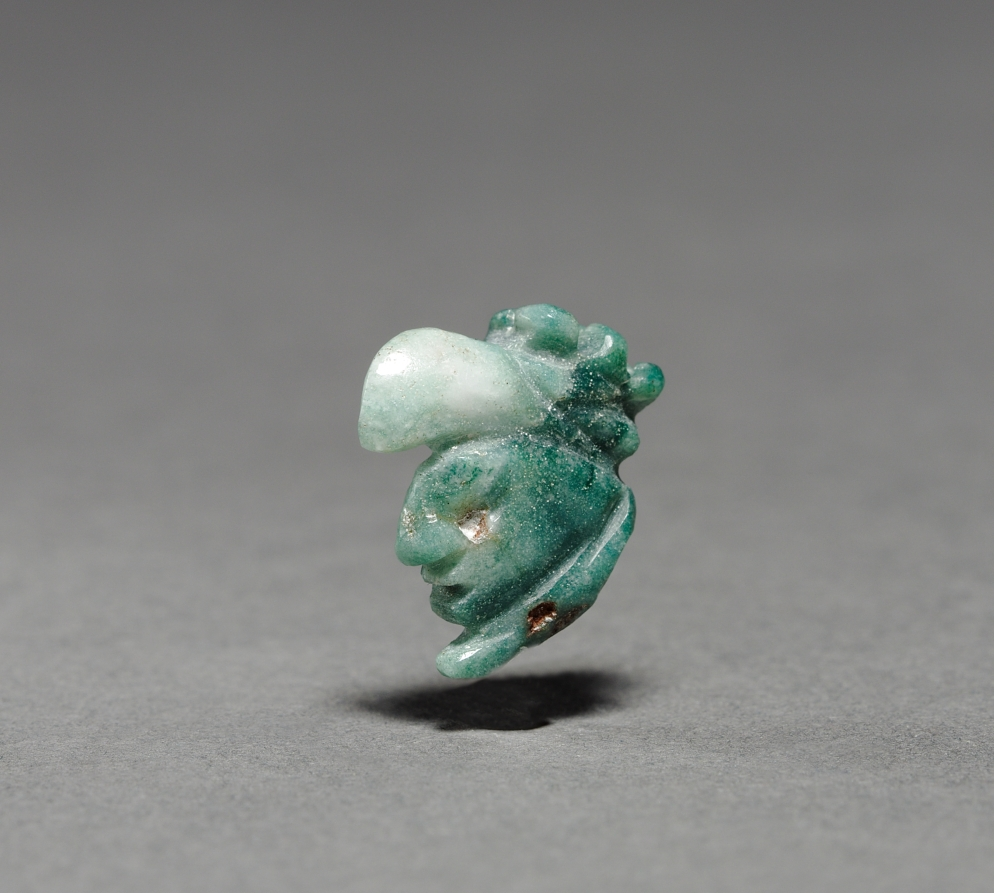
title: Head in Bird's Beak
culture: Mexico, Oaxaca, Mixtec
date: 1200–1519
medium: serpentine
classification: Sculpture